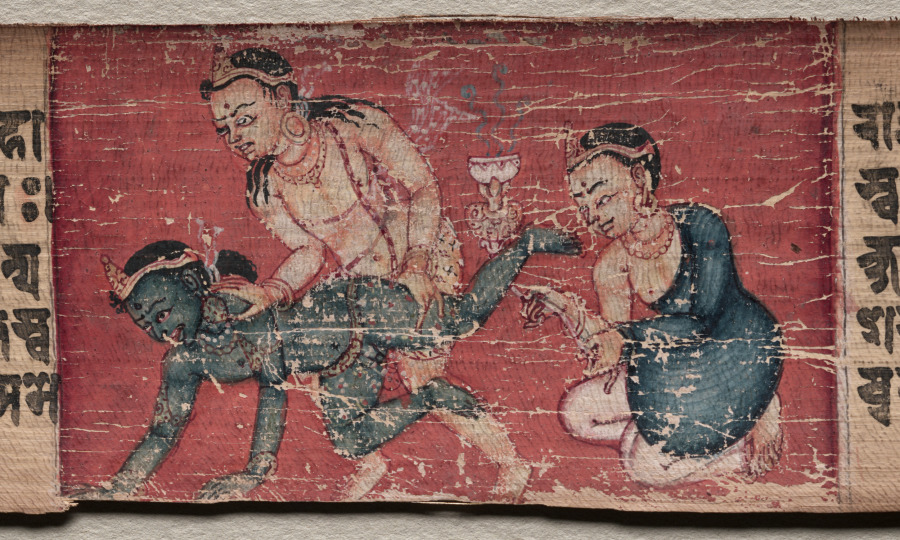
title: Bodhisattva Samantabhadra purifies the path to enlightenment, with Manjushri, folio 348 (verso) from a Gandavyuha-sutra (Scripture of the Supreme Array)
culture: Nepal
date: 1000–1100s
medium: gum tempera and ink on palm leaf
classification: Painting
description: The painting in the center shows a righteous bodhisattva tossing aside a blue-skinned heretic, while an impious blue-clad monk sits behind them, the next to be overpowered by the righteous one. In the painting on the left, the Bodhisattva of Wisdom, Manjushri, brandishes his sword, and at the far right, a Buddhist priest (Vajracharya) sets fire to a Hindu sage in a rocky landscape.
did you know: Blue-clad monks were said to visit prostitutes, drink liquor, and practice extreme tantric rituals.